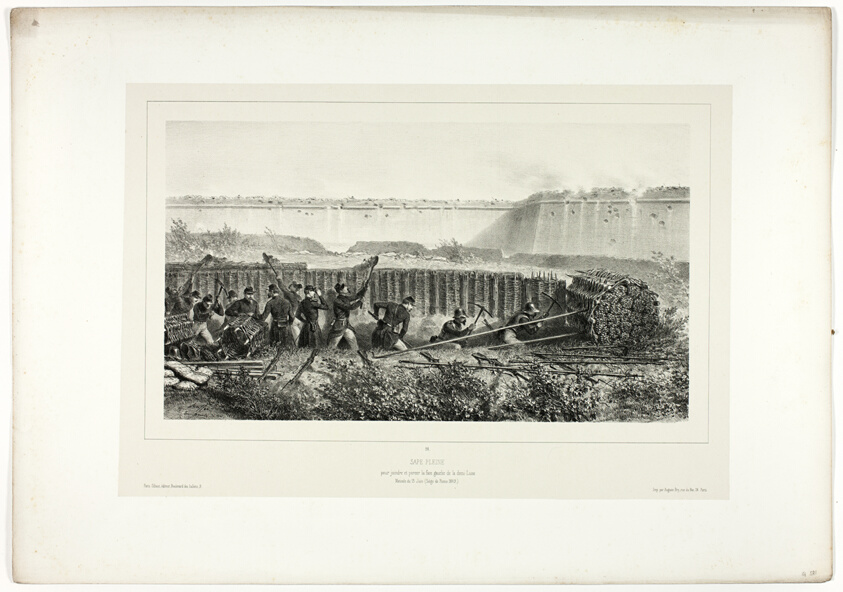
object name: Print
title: Sapping in full swing, from Souvenirs d’Italie: Expédition de Rome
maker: Denis Auguste Marie Raffet (French, 1804-1860); printed by Auguste Bry (French, 19th century); published by Chez Gihaut Frères (French, 19th century)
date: 1858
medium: Lithograph in black on warm ivory wove chine laid down on off-white wove paper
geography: France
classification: lithograph; print; prints and drawing